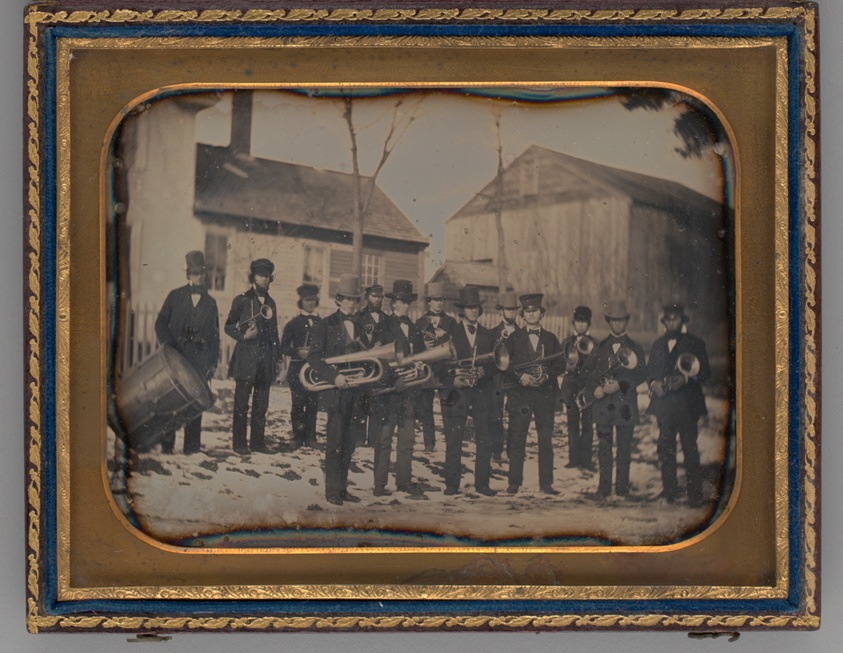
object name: Photograph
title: Untitled (Brass Band)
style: 19th century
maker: Unknown maker; American, 19th century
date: 1852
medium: Daguerreotype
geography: United States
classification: portrait; photograph; photographic process; photography; portrait; daguerreotype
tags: lundberg collection, portraits, instruments, Male, musical instruments, musicians, portraits: male subject, portraits: multiple subjects